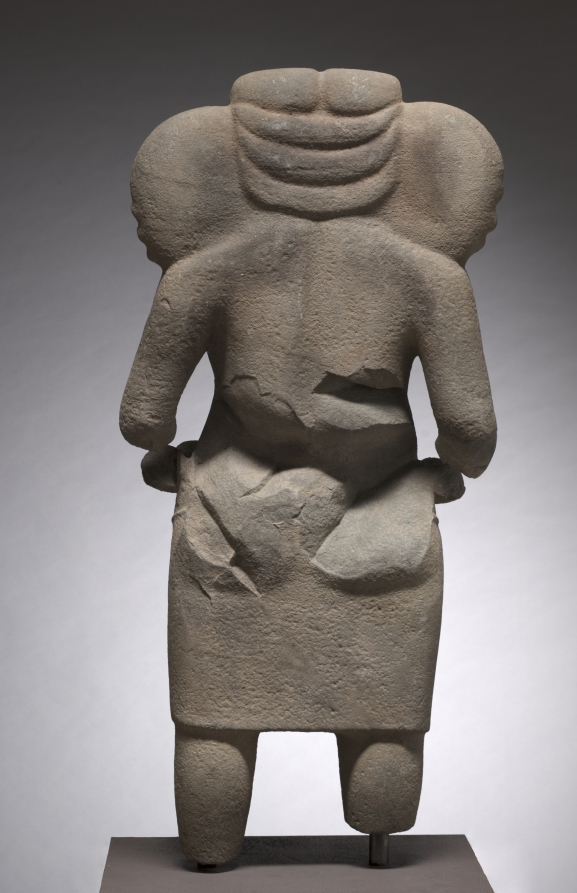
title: Ganesha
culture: Southern Cambodia or Vietnam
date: 600s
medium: sandstone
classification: Sculpture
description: Among the first Hindu deities to be venerated in the form of a large-scale stone sculpture in Southeast Asia, Ganesha presides over obstacles, either creating or removing them. At the beginning of any endeavor, to assure its success, worshipers affectionately offer him prayers and food, such as the sweet cakes and radish he enjoys in this sculpture.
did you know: Ganesha wears a short sampot held by a narrow belt.